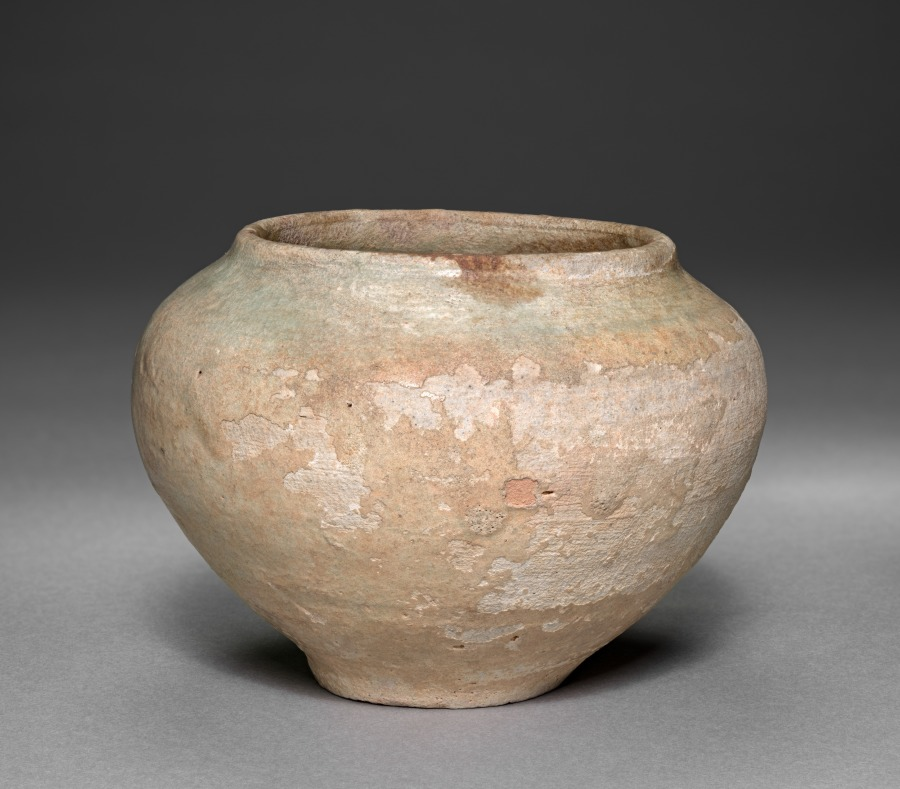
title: Jar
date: 1100s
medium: Pottery, glazed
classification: Ceramic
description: This jar is one of the rare porcelain examples from the Goryeo period (918–1392). In Korea at that time, both celadons and porcelains were produced in the same kilns, explaining why this porcelain jar bears a greenish blue glaze.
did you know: This jar is one of the rare porcelain examples from the Goryeo period (918–1392).